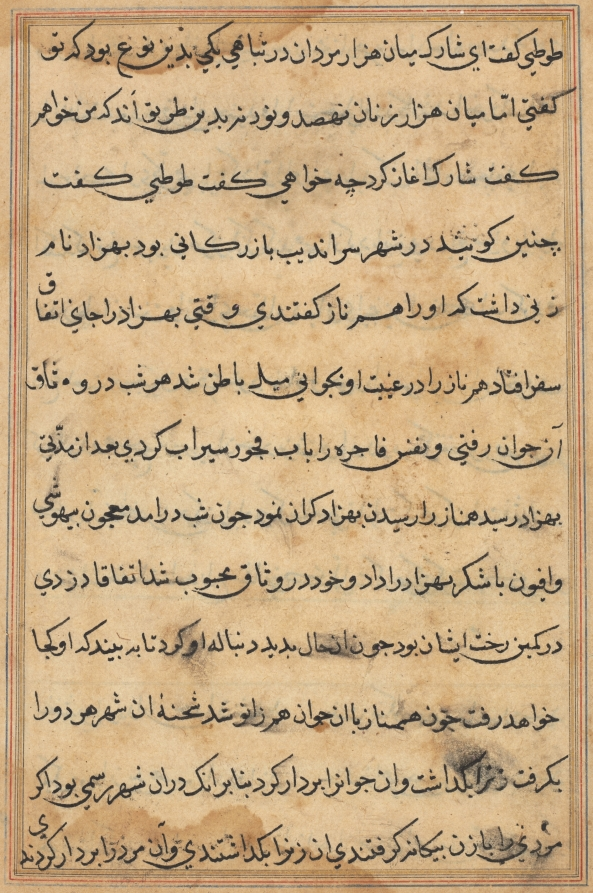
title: Page from Tales of a Parrot (Tuti-nama): text page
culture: Mughal India, court of Akbar (reigned 1556–1605)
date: c. 1560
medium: gum tempera, ink, and gold on paper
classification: Painting